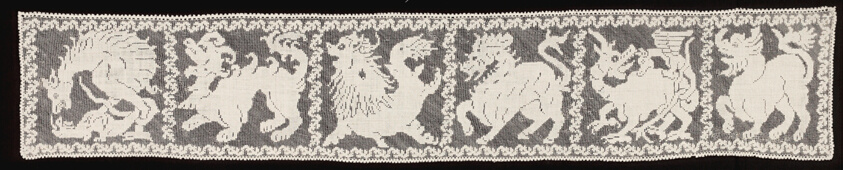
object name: Textile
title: Border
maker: Italy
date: 1575/1625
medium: Linen, square netting; embroidered with linen in cloth stitches; edged with linen in chained loops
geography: Italy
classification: textile; needlework (visual works)